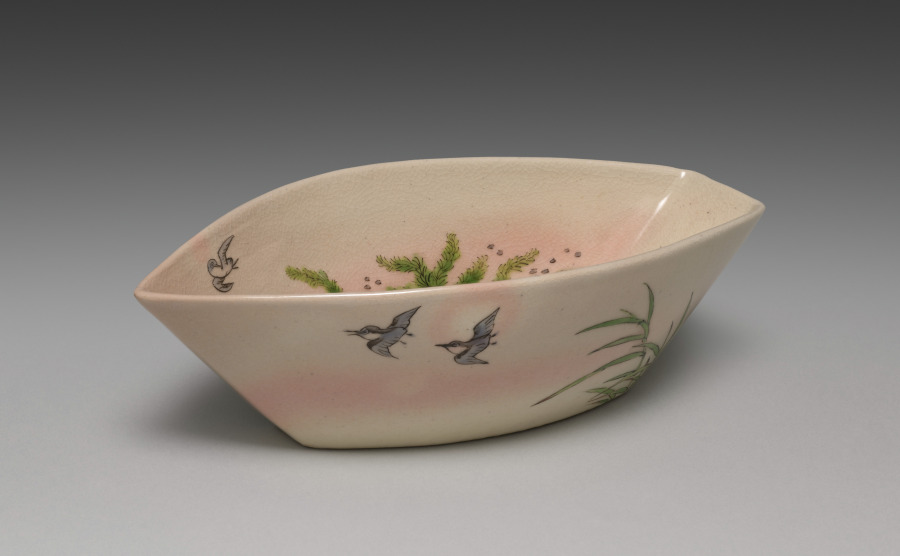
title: Boat-Shaped Bowl with Plovers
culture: Japan, Meiji period (1868–1912)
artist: Seifū Yohei III (Japanese, 1851–1914)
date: 1893–97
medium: Stoneware with crackled glaze and overglaze color enamel and gold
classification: Ceramic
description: Overglaze color enamels create a seascape made complete by the bowl’s boat shape. The bowl’s form inserts a human presence into the scene, much in the way rusu mōyō is used in paintings to suggest people just out of view. Rusu mōyō is a pictorial device by which the presence of someone physically absent from an image is conveyed through the depiction of clothing or other items. The inside of the bowl has a scene of plovers flying through the sky over a profusion of seaweed in sand below. In addition to the black, gray, and green of the overglaze elements, warm pink banding and mottling in the clay come through the glaze and are remarkably effective at suggesting the seashore.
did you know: On the outside of the bowl, on each side, birds fly about grasses in search of a meal.